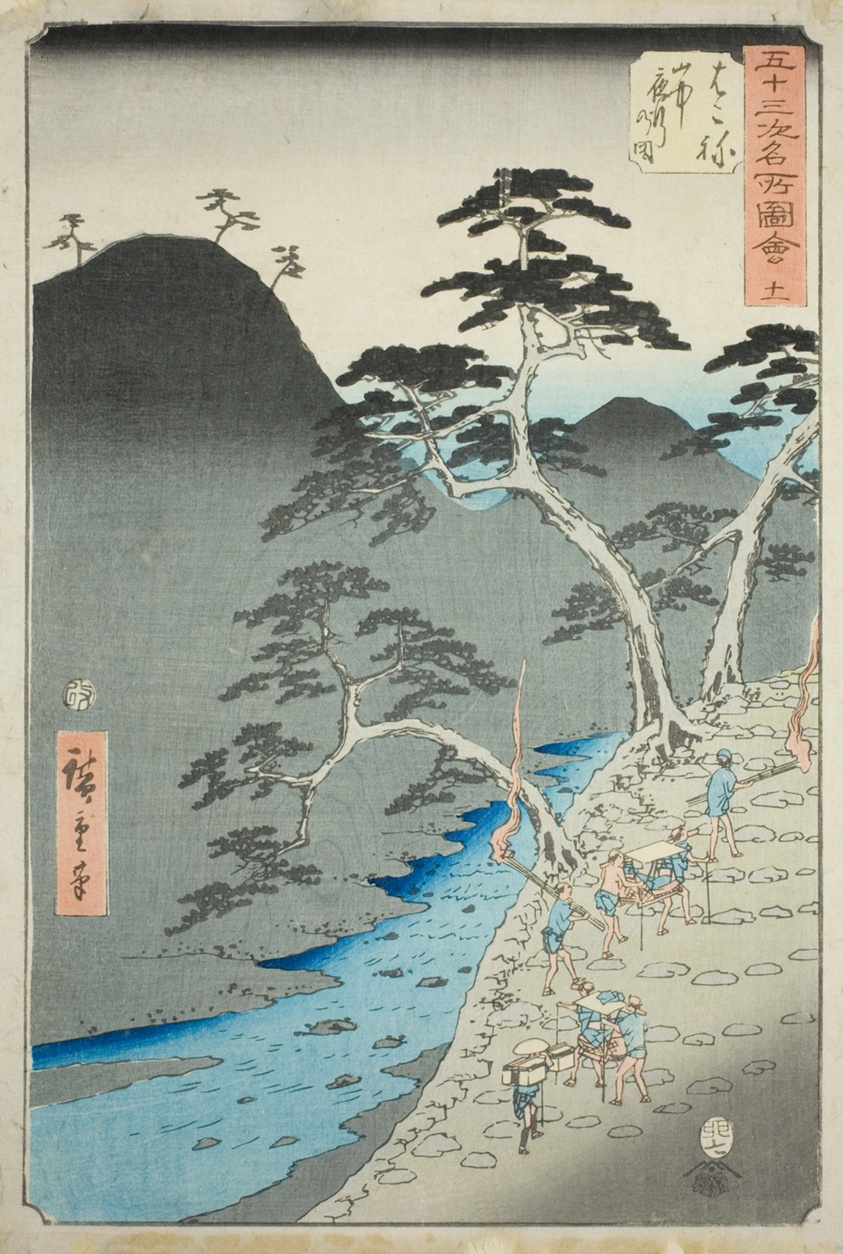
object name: Print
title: Hakone: Night Procession in the Mountains (Hakone, sanchu yagyo no zu), no. 11 from the series "Famous Sights of the Fifty-three Stations (Gojusan tsugi meisho zue)," also known as the Vertical Tokaido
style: Japanese (culture or style)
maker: Utagawa Hiroshige 歌川 広重; Japanese, 1797-1858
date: 1855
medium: Color woodblock print; oban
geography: Japan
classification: woodblock print; print; asian art